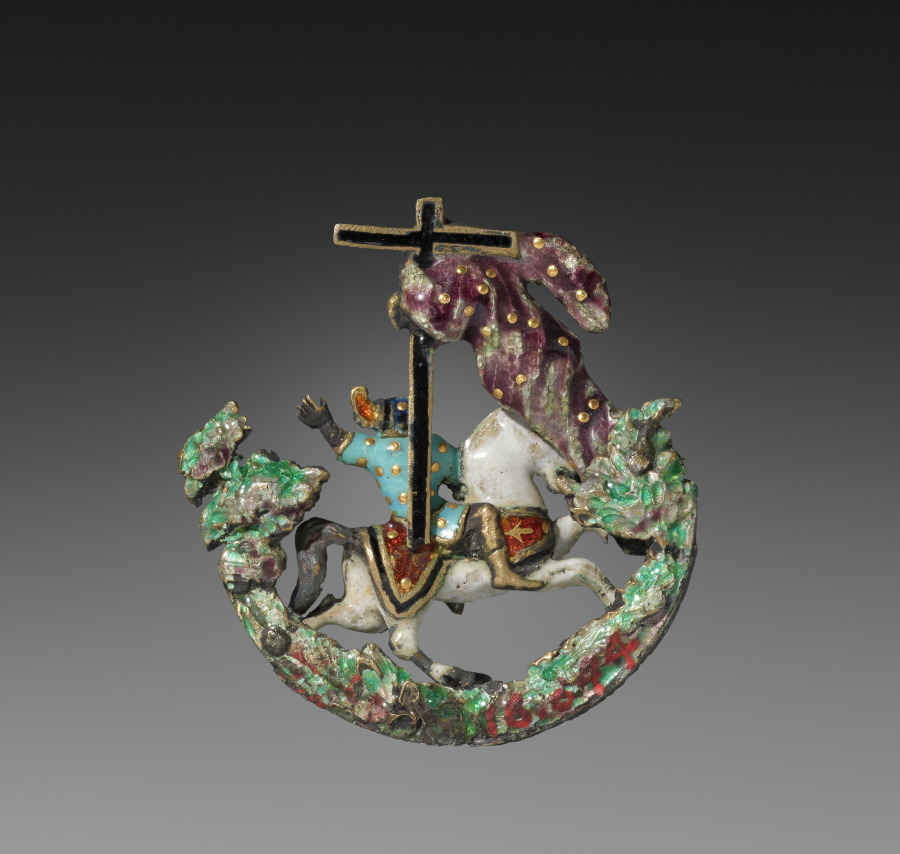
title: Brooch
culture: Central Europe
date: 1700s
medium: enameled metal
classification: Jewelry